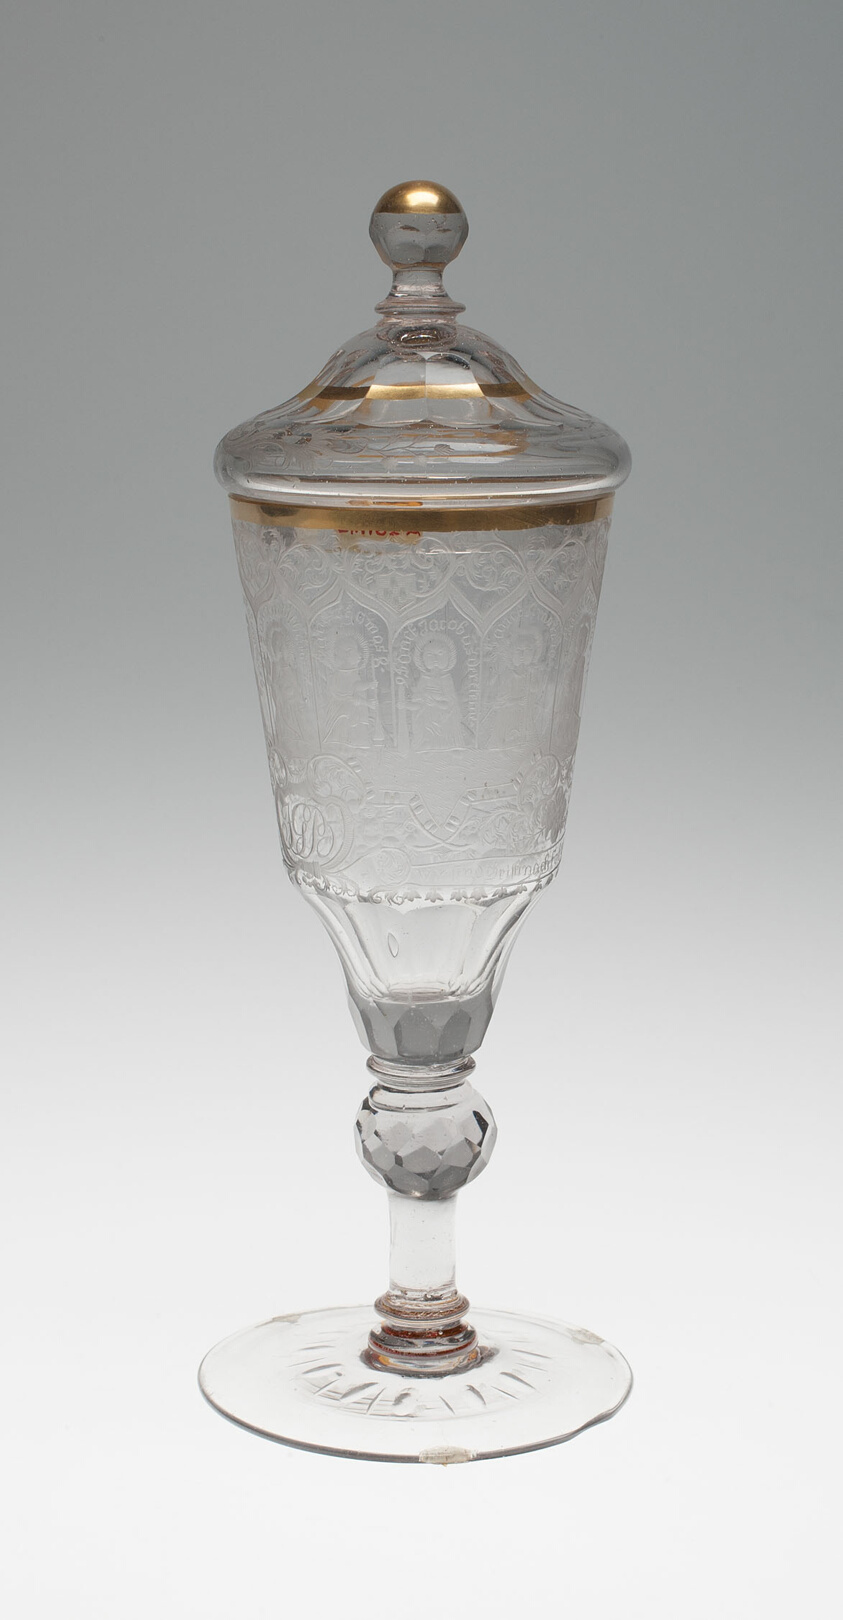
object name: Glass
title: Chalice with Twelve Apostles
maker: Germany, Schleswig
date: c. 1740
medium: Glass; engraved and gilt decoration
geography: Schleswig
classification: glass; european decorative arts